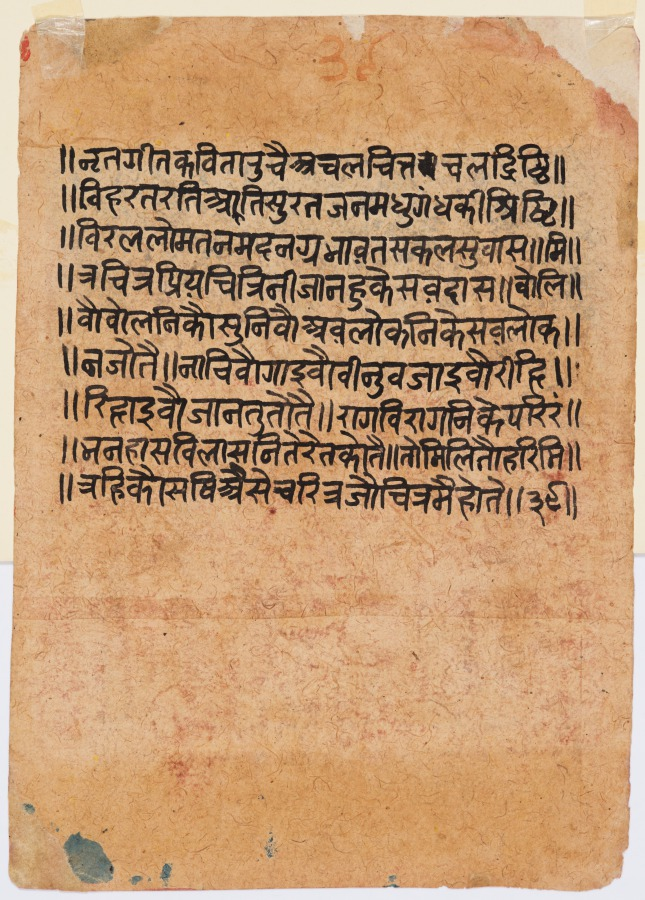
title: Women Play Music for Radha and Krishna: Chitrini Nayika, from a Rasikapriya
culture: Central India, Madhya Pradesh, Malwa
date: c. 1650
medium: gum tempera, ink, and gold on paper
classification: Painting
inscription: nṛta gīta kavitā rucca acala citta cala dṛṣthi viharata rati āti surata jana madhu gaṃdha kī śṛṣthi virala loma tana magana gra bhāvata sakala suvasa mitra citra priya citrinī janahu kesavadasa bolibau bolani kau sunivau avalokani ke savaloka najotai nāchivau gāivau vīnu vajāi vīri-hi rihāivo jānatu totai rāga virāga nike parirambhana hasa vilasa te reta kotai to mili tau hari mitrahi kau sakhi aise caritra jau citra mai hote. 39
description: The idea of aesthetic appreciation as explored by the poet Keshavdas (Indian, 1555–1617) in the excerpt from his Rasikapriya written on the back of this painting is envisioned as the appreciation of music. With their arms around each other, Radha and Krishna enjoy the performance on a stringed instrument (setar), cymbals, and drum in the forest.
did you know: Krishna wears a translucent yellow tunic (jama), tied under the right arm, which is usually the convention for Muslims.